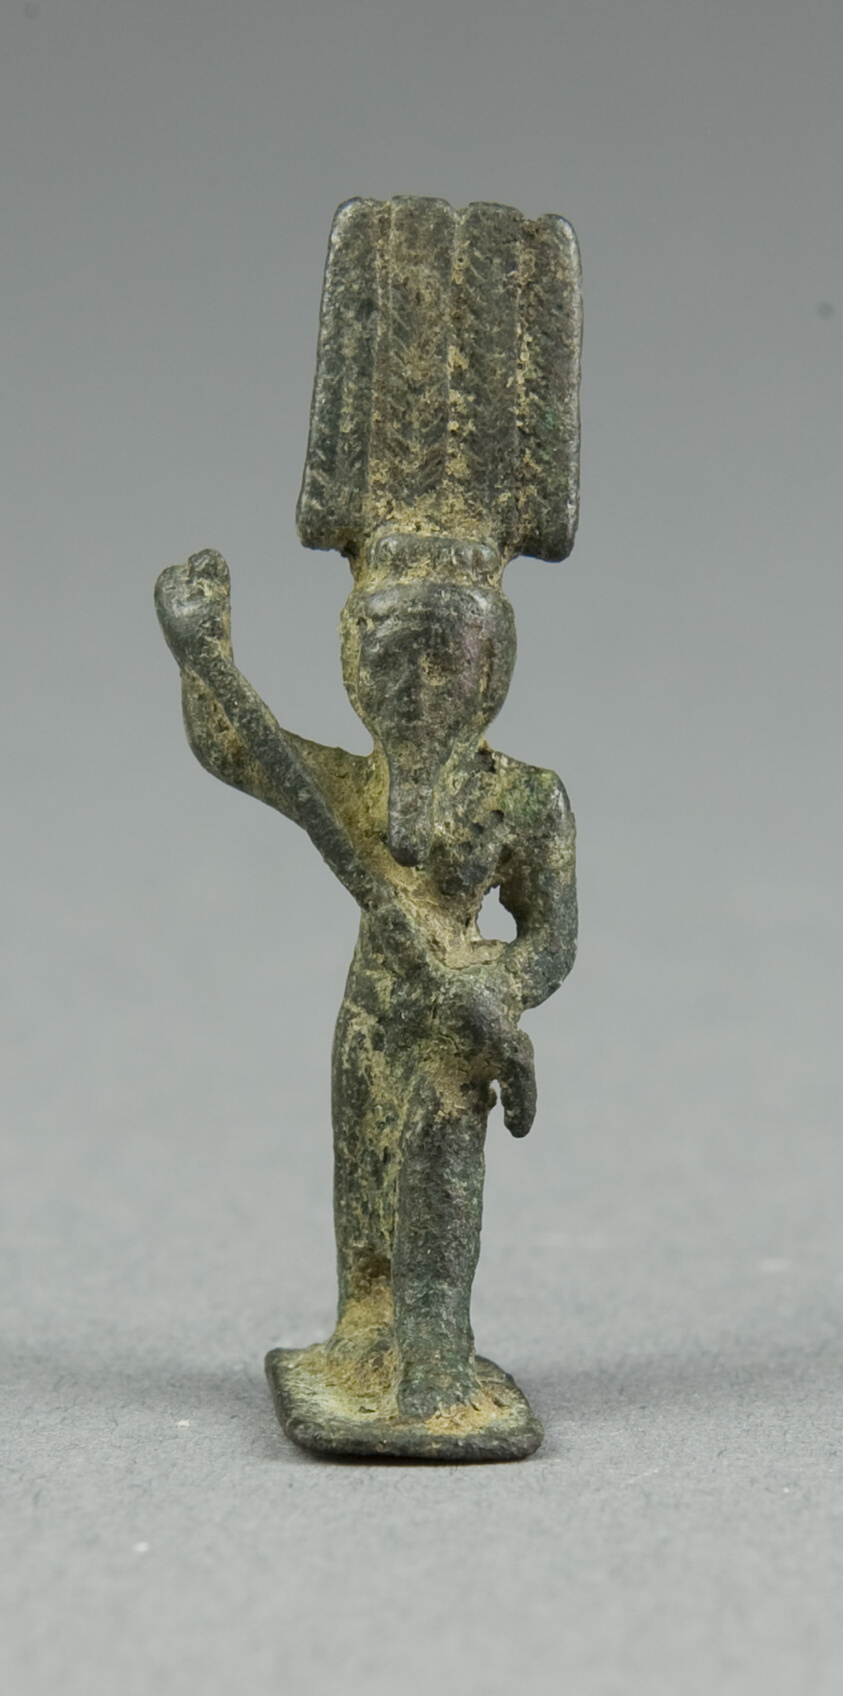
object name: Costume and Accessories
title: Amulet of the God Onuris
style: third intermediate period, egyptian, ancient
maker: Egyptian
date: Third Intermediate Period, Dynasty 21–25 (1070–656 BCE)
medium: Copper alloy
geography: Egypt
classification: amulet; jewelry; bronze; metal; ancient art; costume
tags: gods (deities)